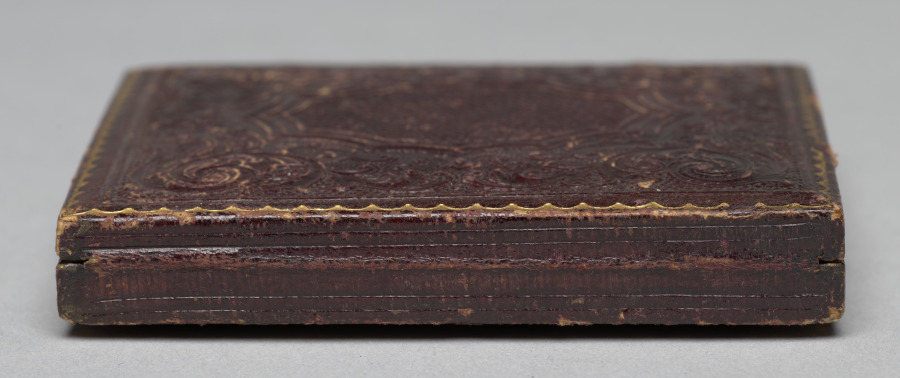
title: Seated couple in mourning attire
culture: America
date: c. 1856–58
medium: daguerreotype, sixth plate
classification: Photograph